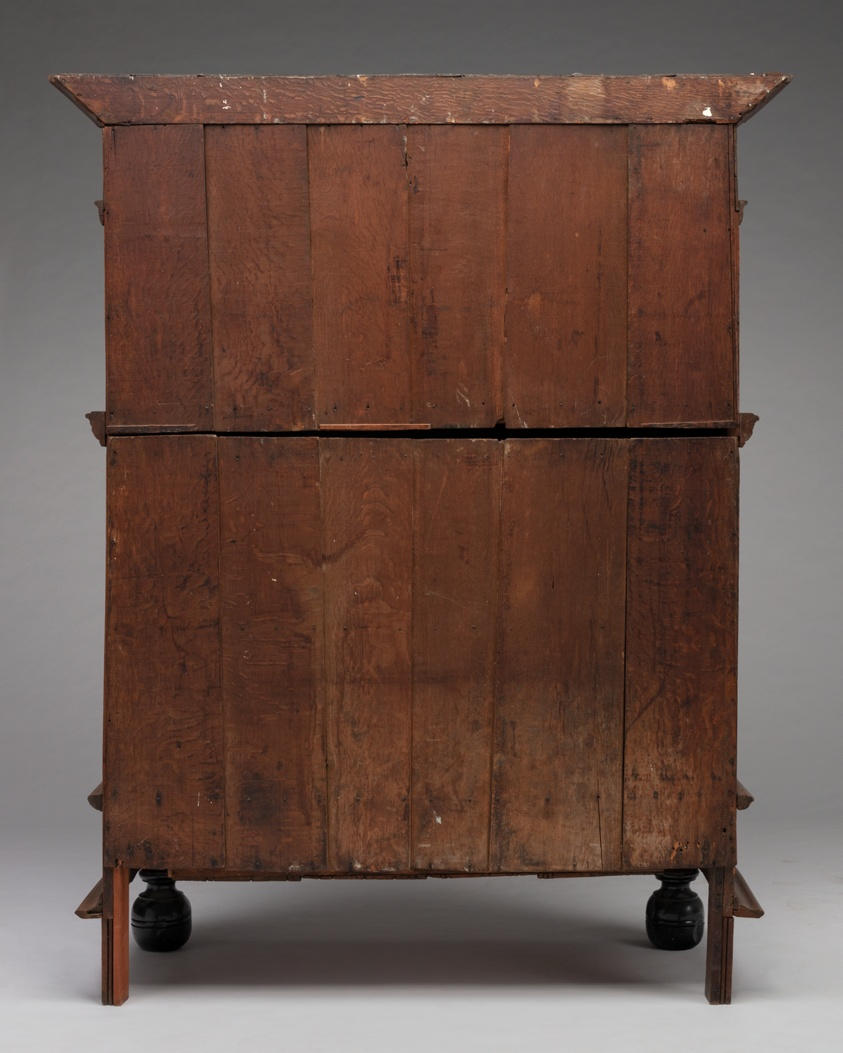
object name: Furniture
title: Linen Cupboard (Kast)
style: Baroque, Mannerism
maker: The Netherlands, probably Amsterdam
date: 1630/50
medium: Oak, pearwood, hardwood, paint, iron, and brass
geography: Netherlands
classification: furniture; decorative arts; functional object; furnishings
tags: lions, animals, architecture